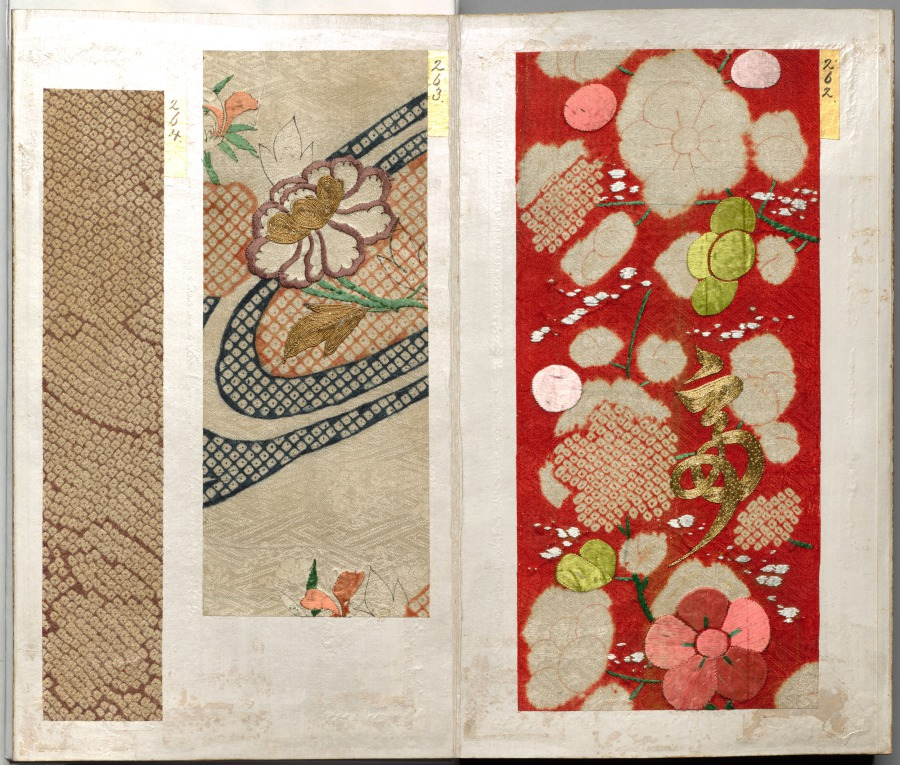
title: Album of Textile Samples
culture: Japan, Edo period (1615–1868)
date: 1600s-1700s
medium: silk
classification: Textile